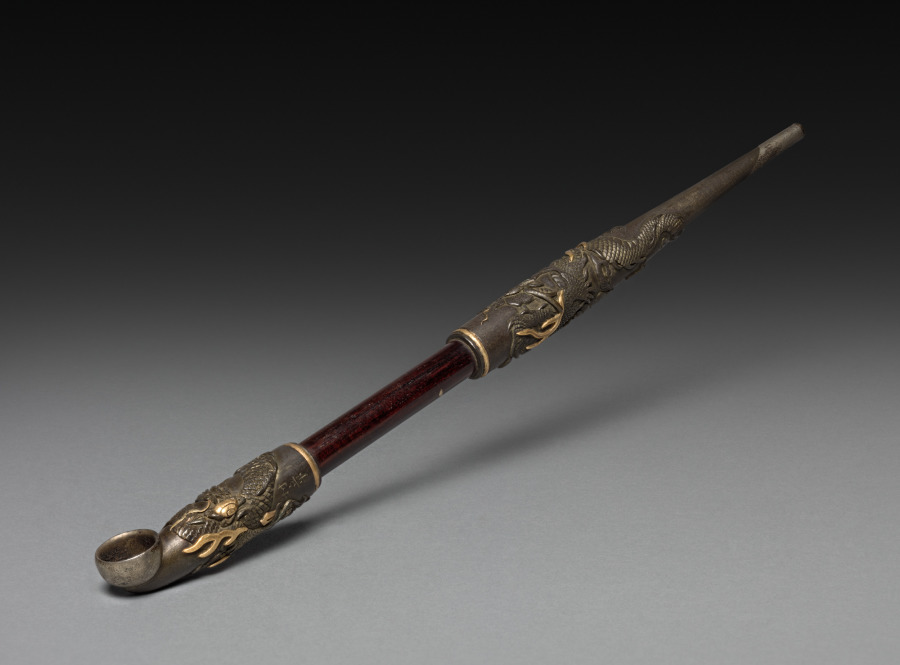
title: Tobacco Pipe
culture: Japan, Edo period (1615–1868)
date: early to mid-1800s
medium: wood, iron, and silver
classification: Miscellaneous